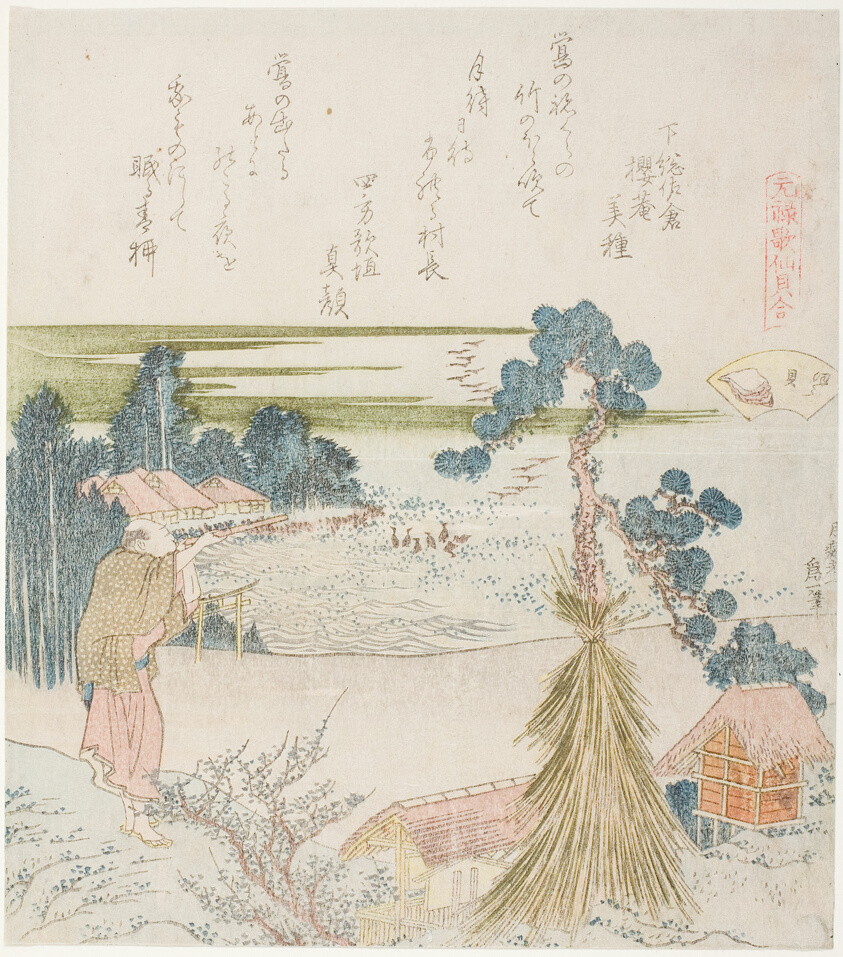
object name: Print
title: A Man Shooting with a Blowpipe, illustration for the Conch Shell (Horagai), from the series "A Matching Game with Genroku-period Poem Shells (Genroku kasen kai awase)"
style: Japanese (culture or style)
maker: Katsushika Hokusai 葛飾 北斎; Japanese, 1760-1849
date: 1821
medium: Color woodblock print; shikishiban, surimono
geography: Japan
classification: woodblock print; print; asian art